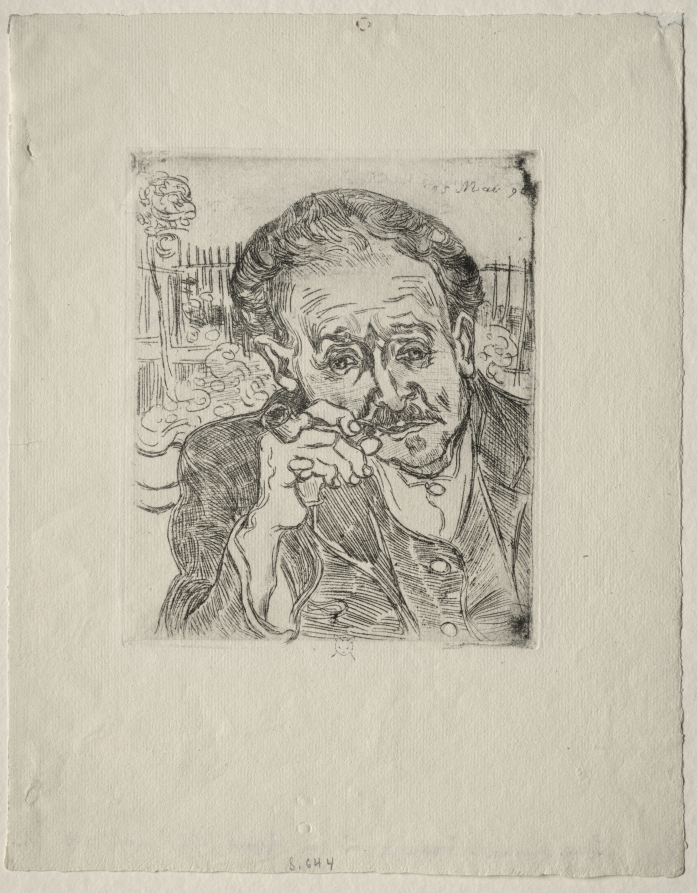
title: Dr. Gachet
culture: Netherlands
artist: Vincent van Gogh (Dutch, 1853–1890)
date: 1890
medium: Etching and drypoint, enhanced with black ink on laid paper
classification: Print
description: This portrait of Dr. Paul Gachet, made just two months before the artist’s death, is the only etching that Vincent van Gogh created. Van Gogh placed himself under the care of Gachet in Auvers-sur-Oise, a small village on the northern outskirts of Paris, at the recommendation of fellow artist Camille Pissarro. The doctor was himself an amateur printmaker and gave Van Gogh a varnished copper plate, helping him print it on his own small hand press. For his first attempt, Van Gogh depicted Gachet seated in his garden smoking a pipe.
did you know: Van Gogh’s brother Theo wrote of this print, “It’s a real painter’s etching. No refinement in the procedure, but a drawing done on metal.”